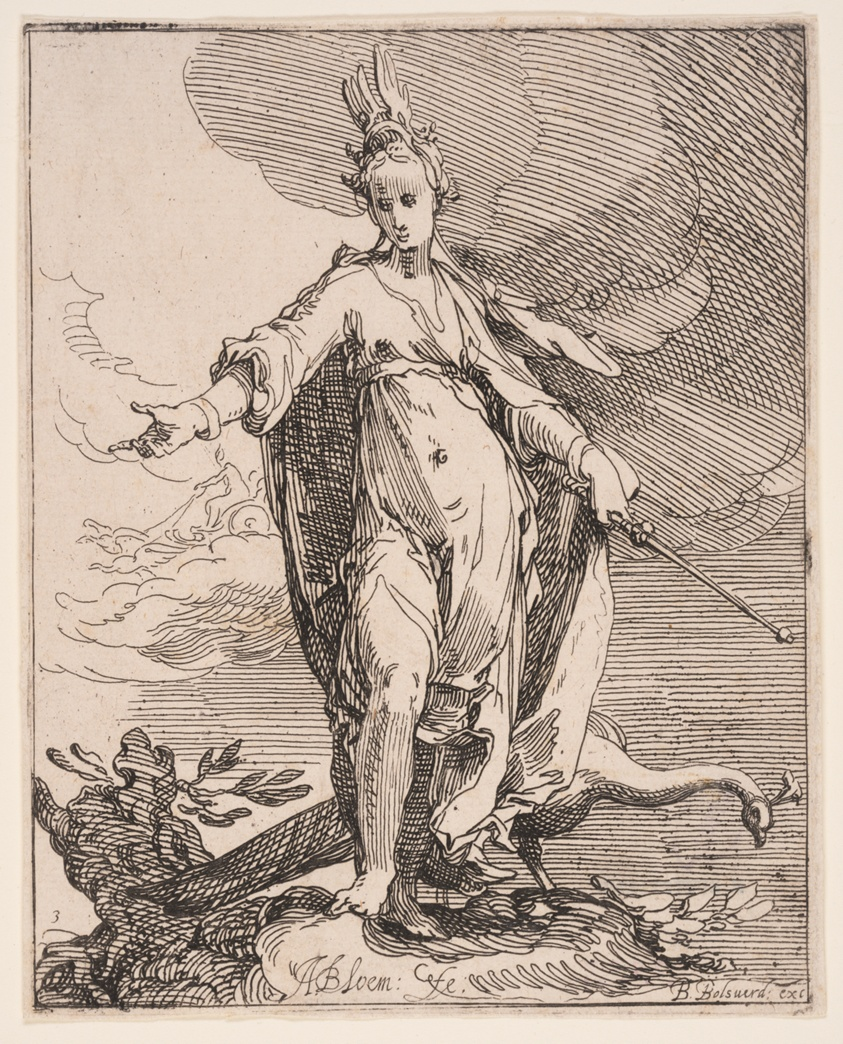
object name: Print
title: Juno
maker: Abraham Bloemaert (Dutch, 1566–1651)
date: c. 1610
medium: Etching on paper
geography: Netherlands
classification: etching; paper; print; prints and drawing